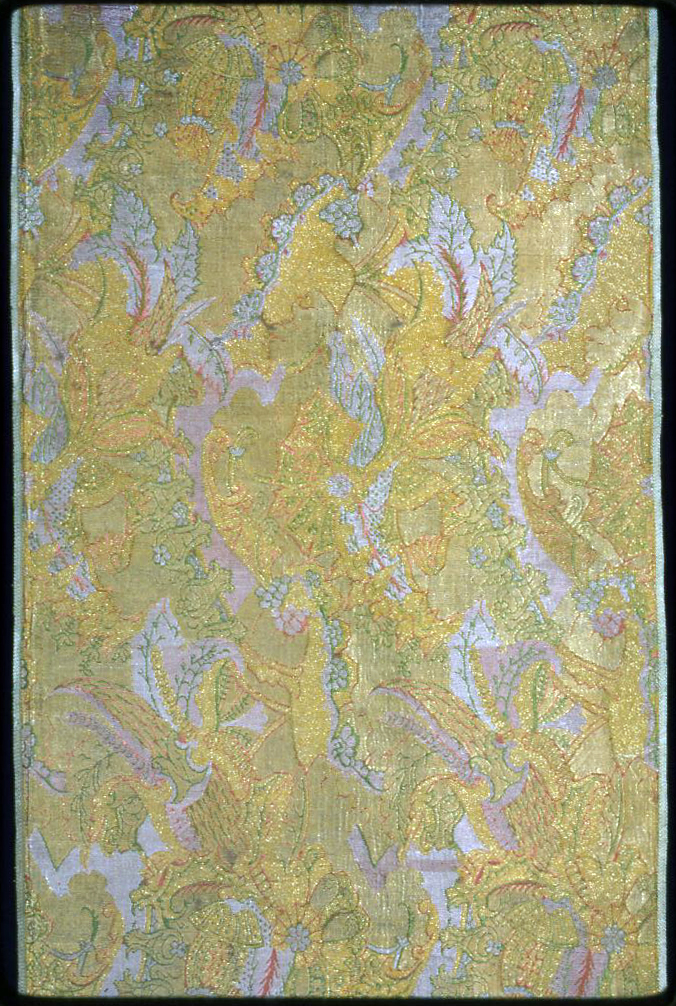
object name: Textile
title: Panel (Dress Fabric)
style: "bizarre" style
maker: France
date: c. 1718/19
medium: Silk, gilt-metal-strip-wrapped silk, warp-float faced 7:1 satin weave with secondary binding warps tying supplementary patterning wefts, supplementary brocading wefts, and self-patterning ground wefts in 3:1 and 2:2 twill interlacing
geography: France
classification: textile; weaving